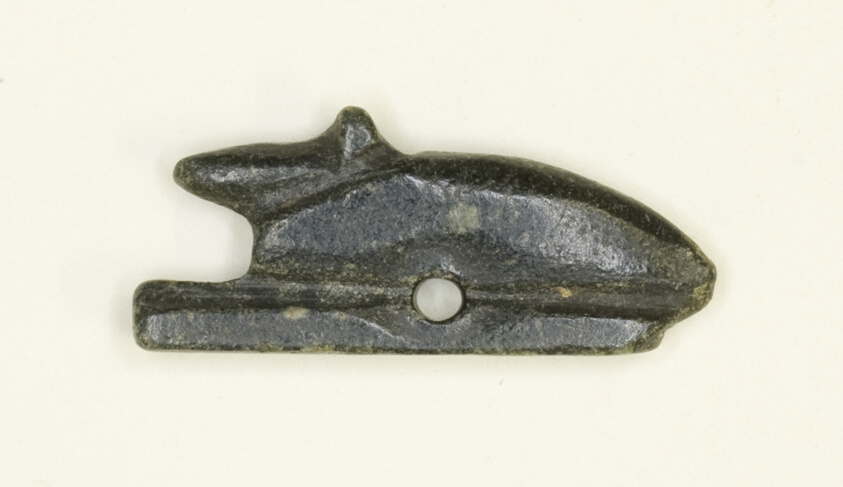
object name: Costume and Accessories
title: Amulet of an Ichneumon (?)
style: egyptian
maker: Egyptian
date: Late Period–Ptolemaic Period (?) (about 7th–1st centuries BCE)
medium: Stone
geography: Egypt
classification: amulet; jewelry; stone; ancient art; costume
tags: animals